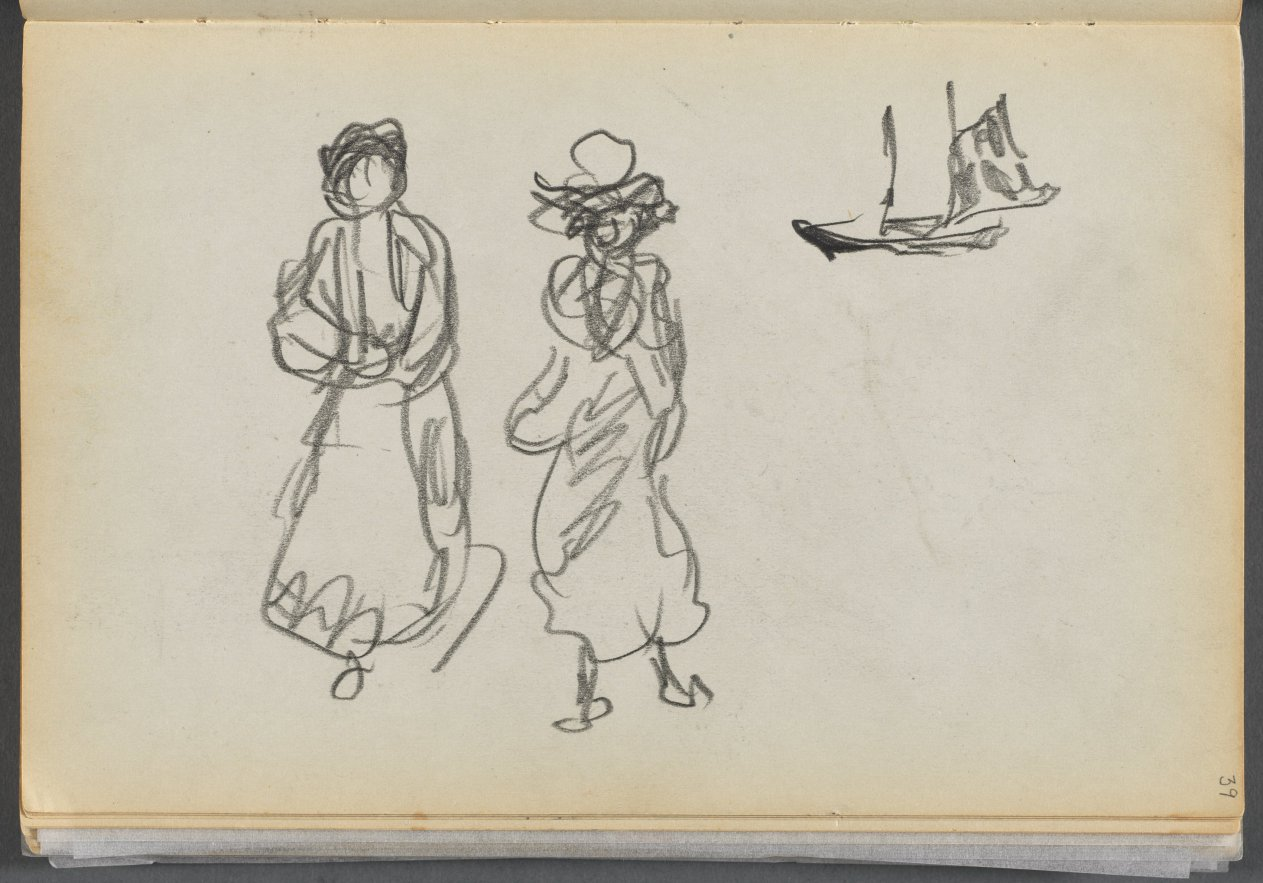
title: Sketchbook- The Granite Shore Hotel, Rockport, page 039: Two Figures and a Sailboat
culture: America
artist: Maurice Prendergast (American, born Newfoundland [now Canada], 1858–1924)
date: 1905–10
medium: graphite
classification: Bound Volume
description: This sketchbook contains 72 pages of pencil drawings and 9 watercolors of Cape Ann. On the inside of the cover Prendergast wrote the address of the Granite Shore Hotel in Rockport, Massachusetts.